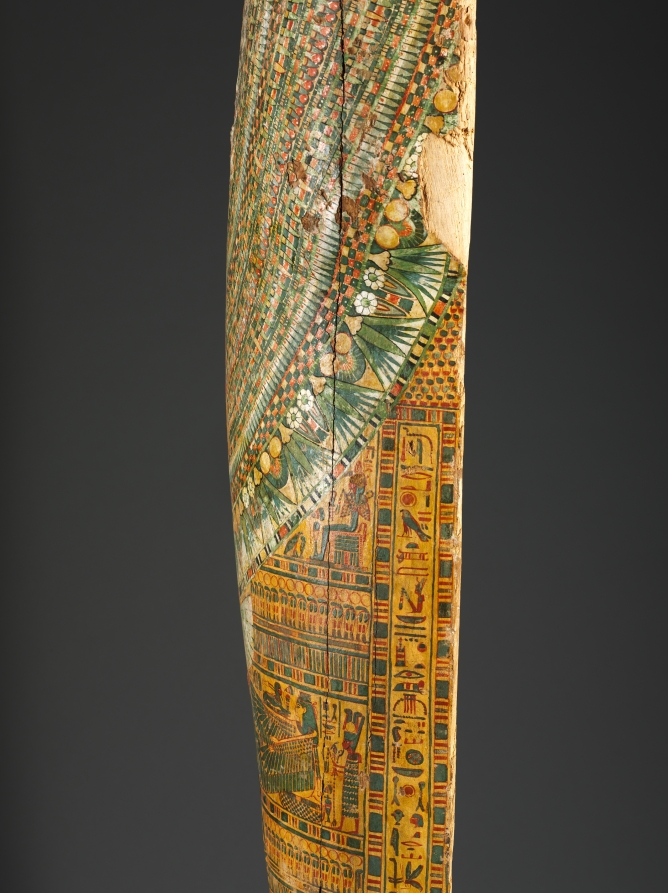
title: Coffin of Bakenmut (lid)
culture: Egypt, Thebes, Third Intermediate (1069–715 BCE), Dynasties 21–22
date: c. 1000–900 BCE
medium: gessoed and painted sycamore fig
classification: Funerary Equipment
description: The coffin of Bakenmut is one of the finest examples of painted wooden coffins made for the priests of Amen and their families at Thebes during Dynasty 21 and early Dynasty 22. The pharaohs of this time were no longer buried in the Valley of the Kings, but instead built tombs in the Delta, far to the north, where they resided. Security was lax in the Theban necropolis. The coffins and funerary goods of the wealthy citizens of Thebes were placed in unmarked and undecorated family tombs cut into the cliffs on the west bank of the Nile. All the care and detail that in more prosperous times were devoted to the decoration of the tomb chapel were now lavished on the elaborately painted coffins. Every available surface is crowded with religious scenes, images of funerary gods and goddesses, protective spells, and magical symbols. The deceased appears mummiform. An elaborate floral collar entirely covers the upper body, exposing only the separately attached hands (now lost). A pair of red "mummy braces" are crossed over the chest, their point of intersection marked by a winged sun disk. The lower body is covered with tiny figures modeled in gesso against a yellow background, which gives the effect of gold inlaid with glass or semiprecious stone. The decoration on the interior features two deified dead kings of Dynasty 18. Although these rulers had lived centuries before, memory of their greatness was still very much alive. The main scene near the top depicts Tuthmosis III, the great military pharaoh, who lived 500 years before Bakenmut. Posed as a mummy, the ruler wears a brilliant feathered garment enfolding him with falcon’s wings. The scene below features back-to-back seated images of Amenhotep I, regarded as the patron of the Theban cemetery and worshiped as a local god there.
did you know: Originally another smaller coffin was placed inside this outer coffin and in that the deceased with a mummy board would have rested.